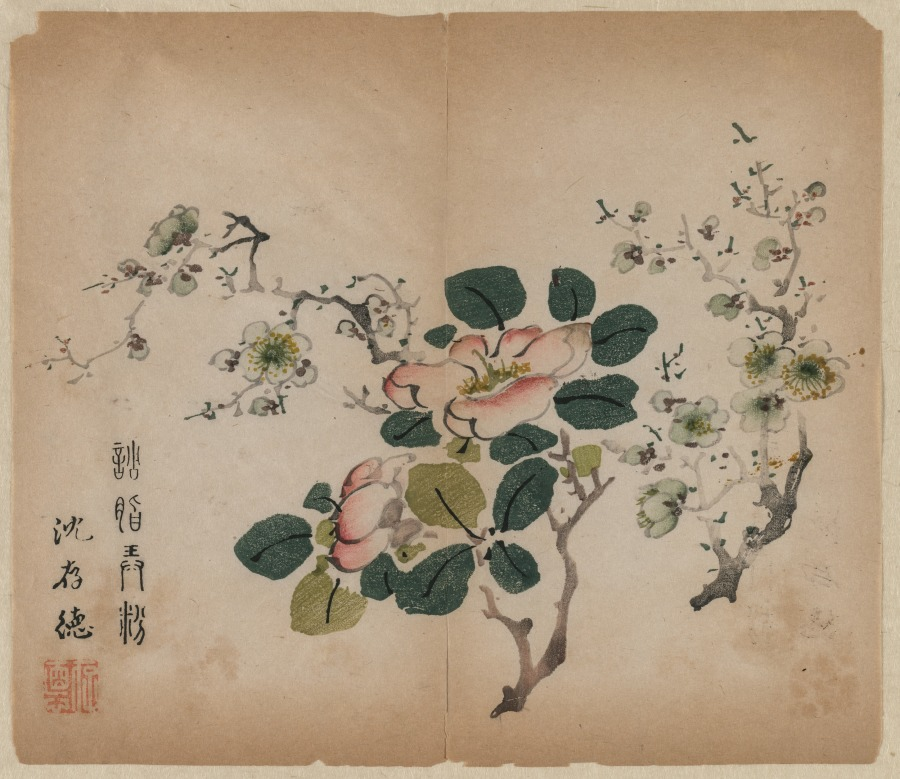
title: Flowering Prunus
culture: China, Ming dynasty (1368-1644) or later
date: 1368–1644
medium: color woodblock print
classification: Print